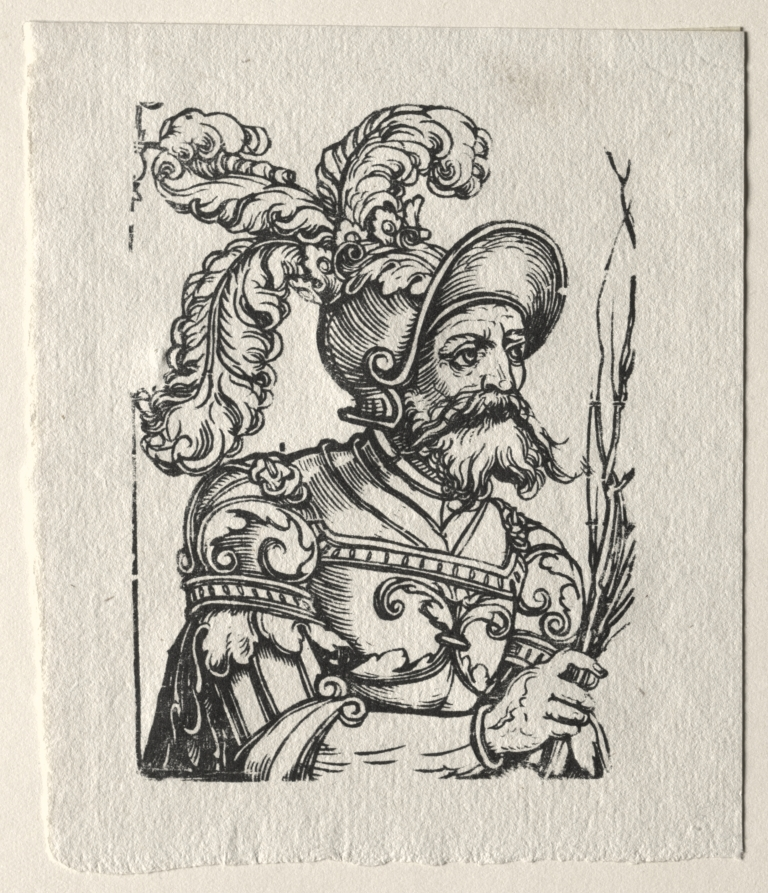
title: Tyrants of the Old Testament: Saul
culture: Germany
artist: Georg Pencz (German, c. 1500–1550)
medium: woodcut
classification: Print